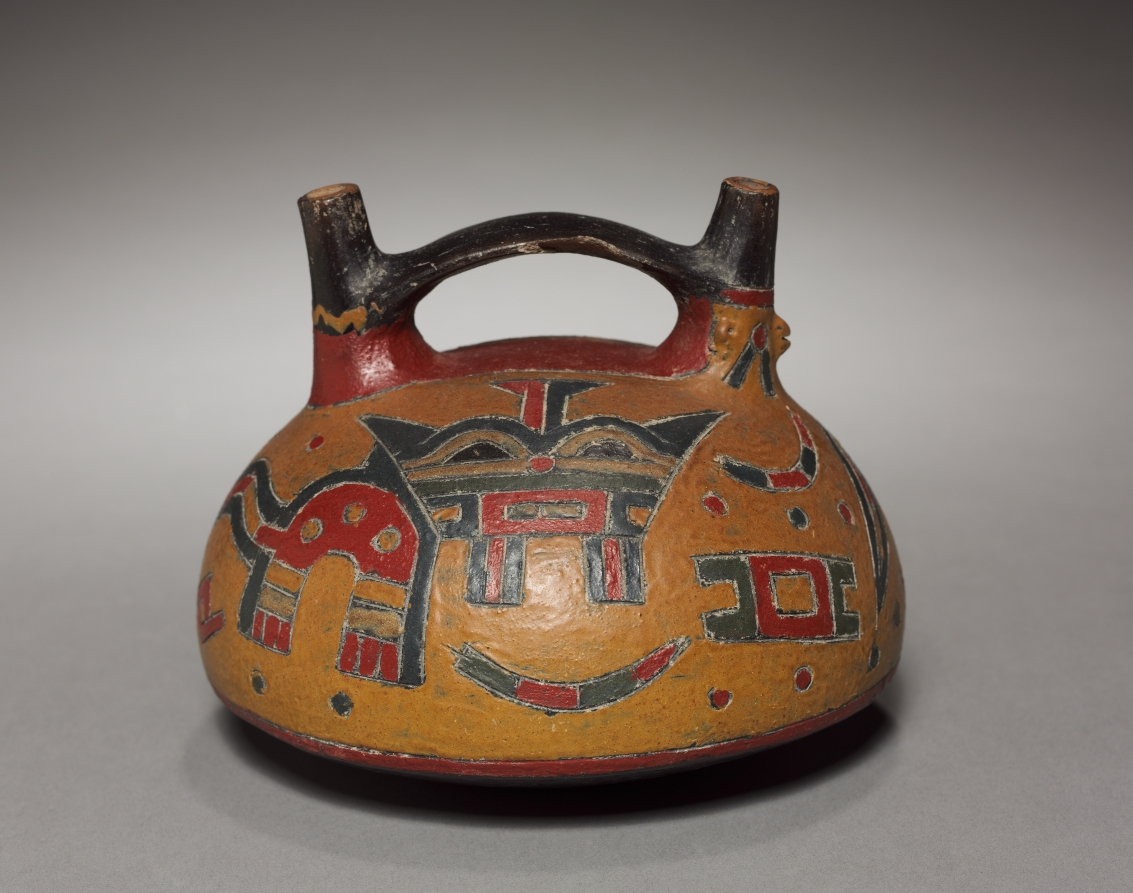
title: Vessel with Feline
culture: Peru, South Coast, Paracas (Cavernas) style (700 BCE–1 CE)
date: 700 BCE–1 CE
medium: earthenware, resin-based paint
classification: Ceramic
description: Little is known of the meaning of the beautifully abstracted felines so often incised on Paracas ceramics. The designs achieve much of their complexity through color applied as resin-based paint after the vessel was fired in a smoky atmosphere that blackened its surface. Two spouts joined by a bridge appear on many fine South Coast ceramics. The form probably had meaning, now lost.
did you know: Small, wild, reclusive felines, pampas cats live on the margins of agricultural fields, where they prey on rodents and other pests that are a farmer’s bane